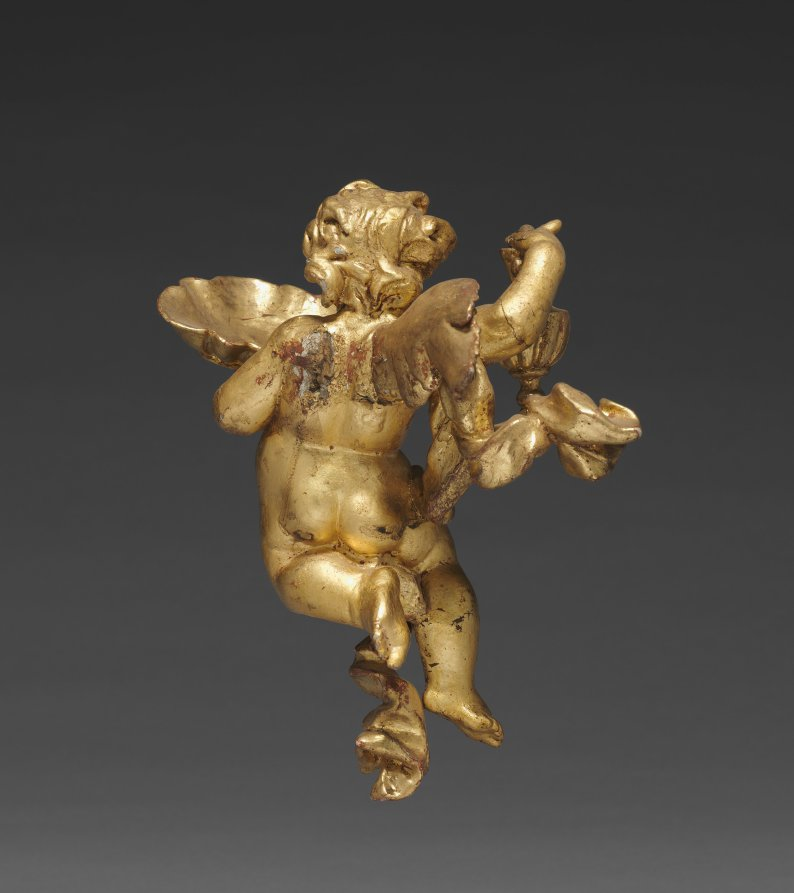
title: Altarpiece with Relics - Putto with Ewer, upper left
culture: Germany, Bavaria, 18th century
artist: Joseph Matthias Götz (German, 1696–1760)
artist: and Workshop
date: c. 1735–40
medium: gilded wood, with relics in niches: gilded wood, mother-of-pearl, ebony, red silk, gold wire, seed pearls, rock crystal, pen and ink on paper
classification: Sculpture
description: Götz covers every surface in gold leaf, giving each part of the object equal importance, rather than simply framing a central picture. In this distinctively Central European approach, figural narrative is subordinate to the overall ensemble. Götz designed this object to rest on top of an altar, probably in front of a larger painted or sculpted decorative scheme. The work contains relics seen through the small windows on the perimeter. These small remains of holy figures demonstrate the persistence of a medieval Catholic tradition well into the 1700s.